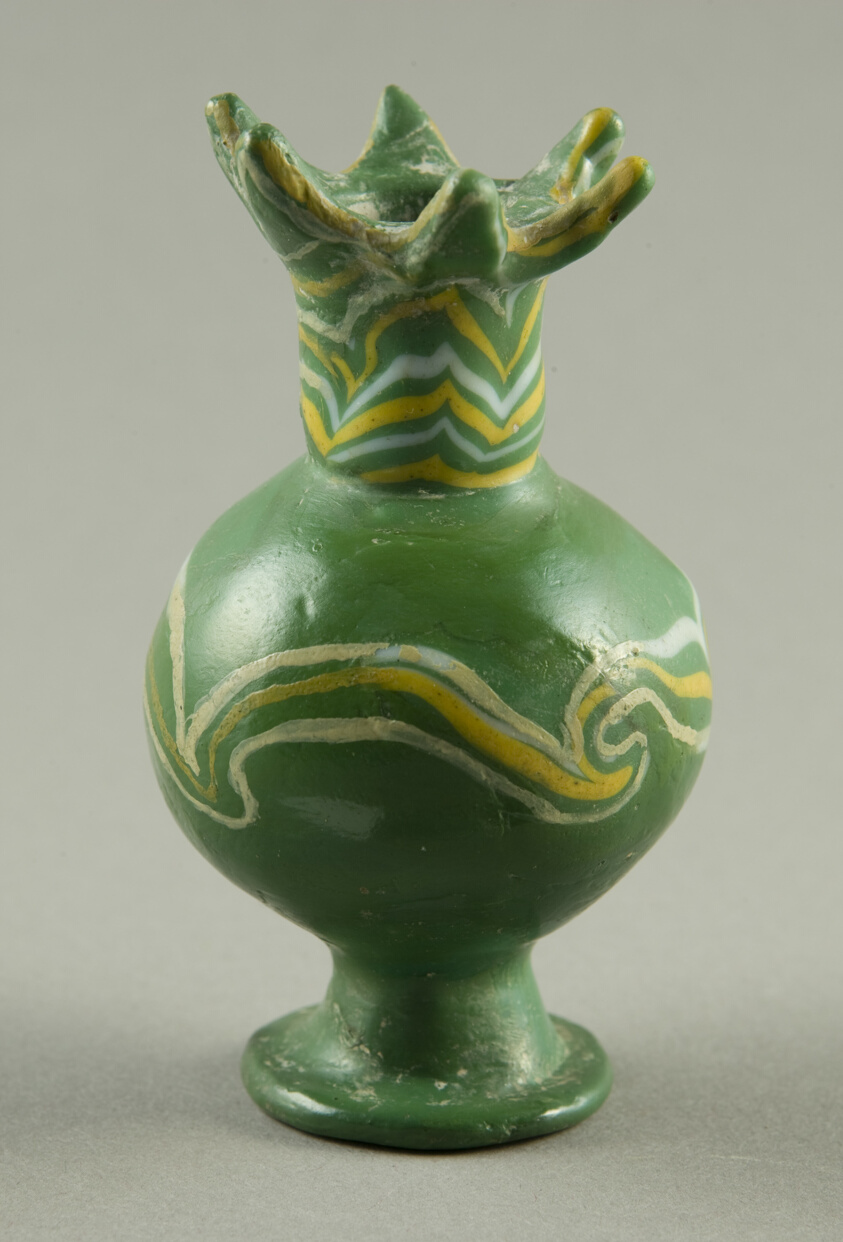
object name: Vessel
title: Vase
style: new kingdom, egyptian, ancient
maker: Egyptian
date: New Kingdom, Dynasty 19 (1295-1186 BCE)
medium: Glass, core-formed technique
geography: Egypt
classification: glass; vessel; ancient art; container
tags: pomegranates, dining, drinking, vase